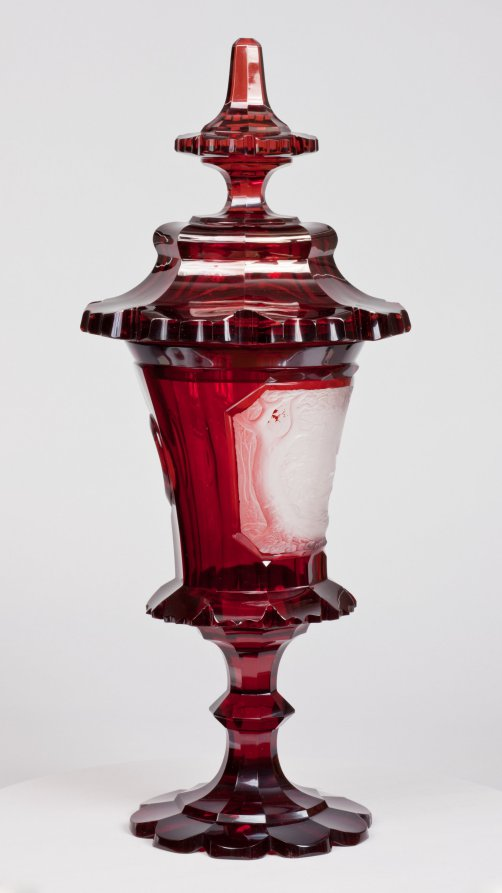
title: Covered Cup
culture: Bohemia, 19th century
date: mid-1800s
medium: ruby glass with engraved decoration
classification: Glass